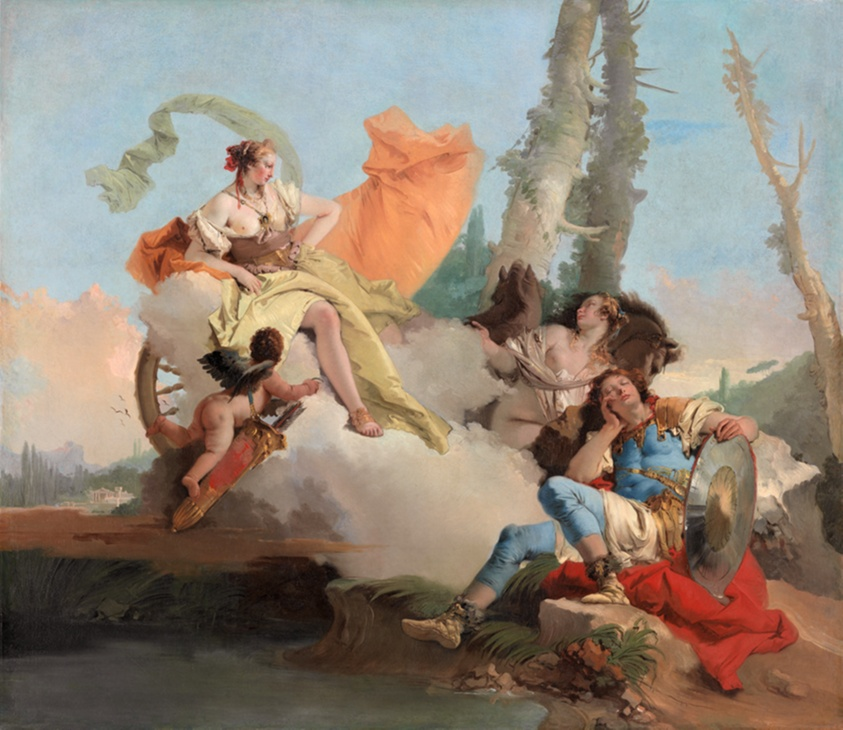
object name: Painting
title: Armida Encounters the Sleeping Rinaldo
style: Baroque, 18th Century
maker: Giovanni Battista Tiepolo (Italian, 1696–1770)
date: 1742/45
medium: Oil on canvas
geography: Italy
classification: oil on canvas; paint; oil paintings (visual works); Italian; painting; european painting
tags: Narrative, woman, woman, weapons, sky, rocks, nature, man, landscapes, landscape, helmets, decorative, decoration, clouds, beauty, Century of Progress, world's fairs, Chicago World's Fairs, sleep, love, animals, horses, shields, plants, dresses, armor, soldiers, trees, goddesses, women, men, cherubs, mythology, mythological figures